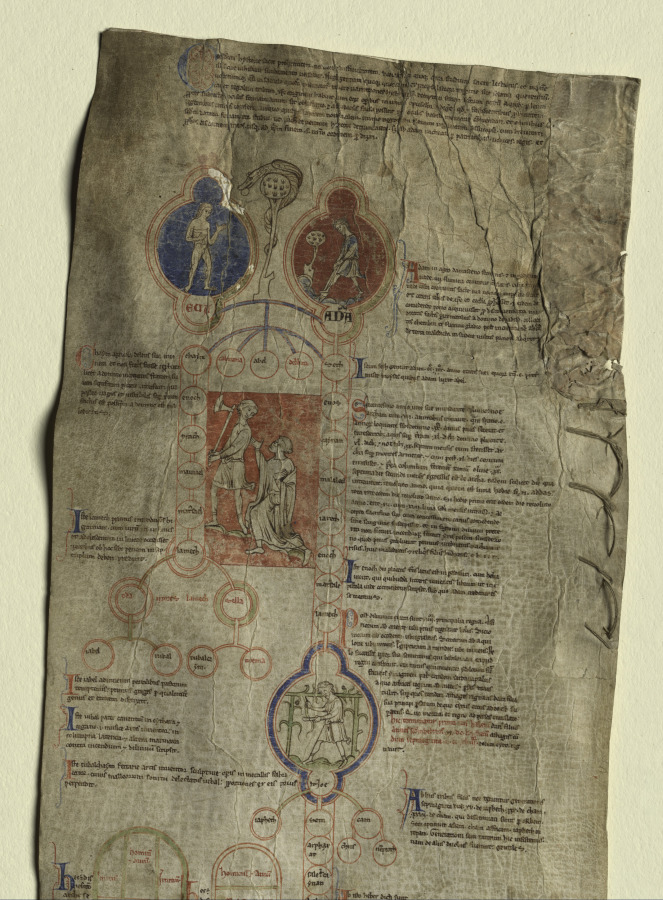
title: Peter of Poitiers's "Compendium Historiae in Genealogia Christi"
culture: England, Canterbury, 13th century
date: c. 1220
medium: ink and tempera on a vellum roll of four membranes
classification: Manuscript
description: This manuscript roll, composed of four membranes formerly stitched together in a continuous roll about nine feet long, has been divided in the middle for easier visibility and study. The text is an abridgment of biblical history focused on the descent of Christ from Adam. It was written by Peter of Poitiers (about 1130–1205), who taught theology and history in Paris and was widely copied. The present roll is an English copy of Peter's text made shortly after his death. Although manuscript rolls were hung on the walls of a classroom as instructional aids to students, some of them have value beyond their textual and historical interest because of the fine quality of their drawings, as seen here. A comparison with Canterbury manuscripts and stained glass of around 1220 is the basis for the attribution to Canterbury. Peter of Poitiers's aim in this project was to assist students prevented from mastering biblical history because of its length and because they were too poor to own books. His text on roll is the briefest possible summary of biblical history. It is arranged in six historical stages, denoting the six ages of the world, as decreed by theological tradition. The first five ages were inaugurated by Old Testament individuals: Adam, Noah, Abraham, David, and Sedecias. The birth of Christ heralded the sixth stage. Beginning at the top of the first membrane, the text consists of brief biographical entries on the ancestors of Christ (Adam, Noah, Abraham, Moses, and David) and other biblical personalities. These extend to the birth of Christ on the fourth membrane, ending with accounts of Hebrew and Roman kings and the Apostles. Each compendium shows the names of the ancestors inscribed within circles, those of direct descent placed vertically in a central column, others scattered in clusters to the right and left. The decoration of the roll consists of a series of medallions of diverse geometrical frames filled with either a figural drawing or a diagram. The style of these pen-and-ink drawings, some illuminated in tempera or tinted with wash, stems from English manuscript and glass painting attributed to the school of Canterbury Cathedral. The style of the museum's illustrations is so close to the stained glass panels made for Trinity Chapel at Canterbury (about 1220) to suggest that an artist active as a glazier in the Cathedral workshop may also have executed the manuscript. In the least, the painter of the roll manuscript was familiar with the style of the painted glass, and on this basis, a date of about 1220 seems appropriate. Additional evidence is supplied by a psalter illuminated at Canterbury shortly before 1220. The figurative scenes in this psalter were apparently illustrated by the same hand that executed the line and wash drawings in the museum's roll.